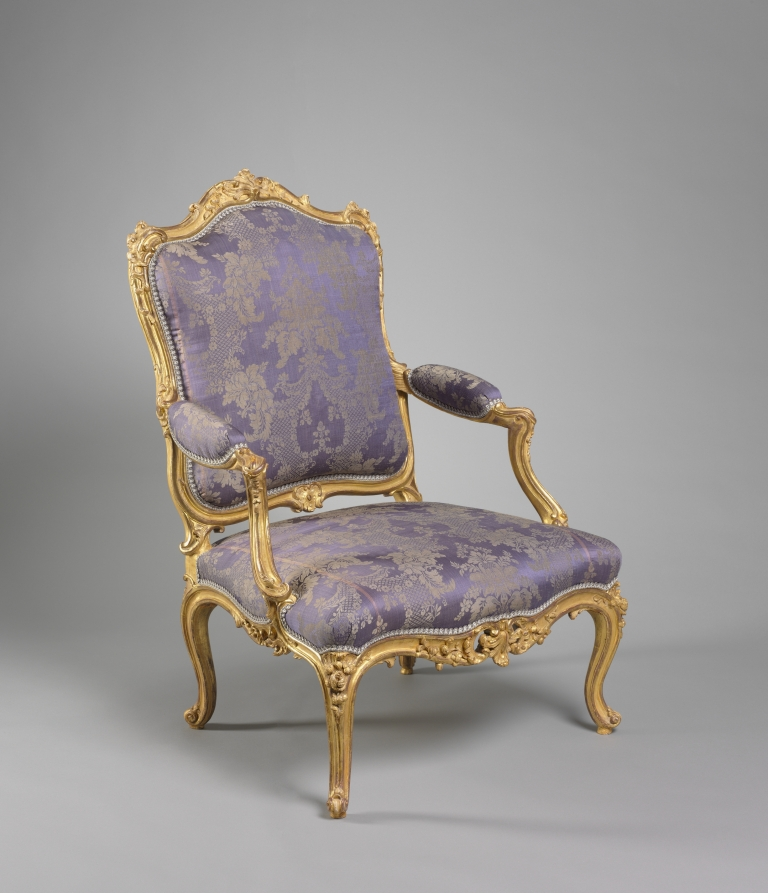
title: Armchair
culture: France, 18th century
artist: attributed to Nicolas Heurtaut (French, 1720–1771)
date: c. 1755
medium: carved and gilded wood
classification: Furniture and woodwork